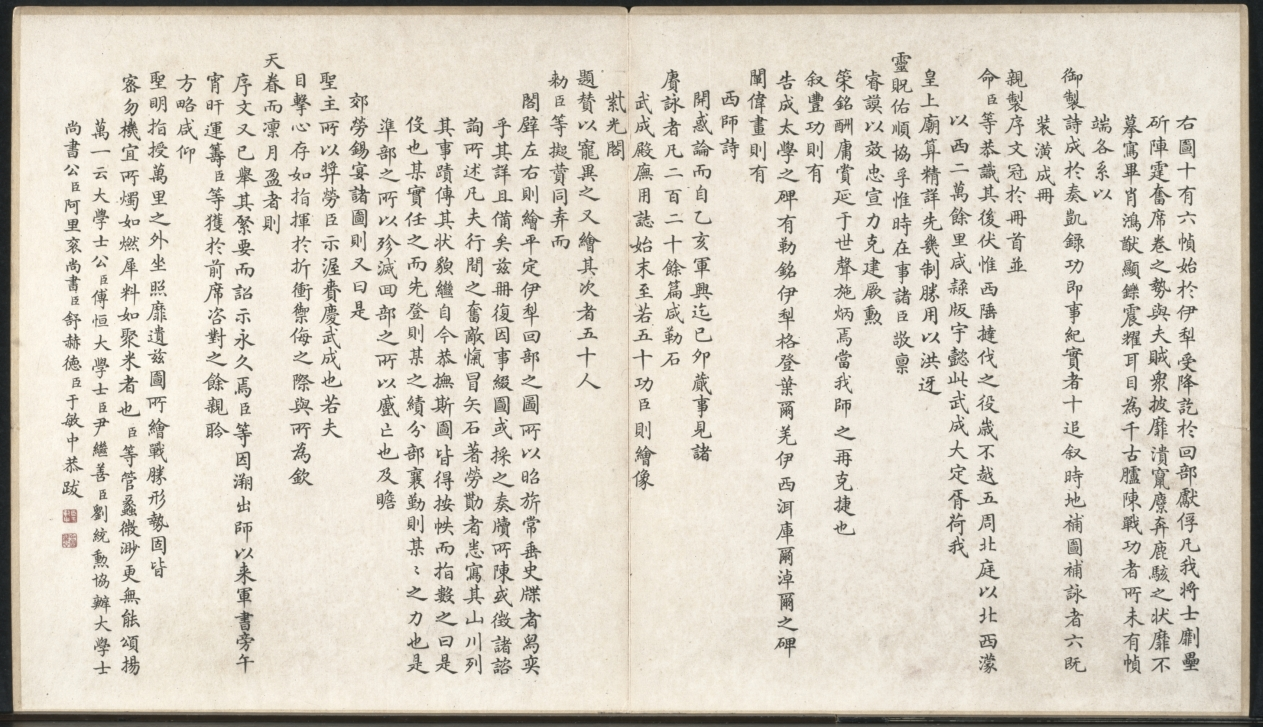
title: Battle Scenes of the Quelling of Rebellions in the Western Regions, with Imperial Poems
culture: China, Qing dynasty (1644–1911), Qianlong reign (1736–95)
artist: Giuseppe Castiglione (Italian, 1688–1766)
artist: Jean Damascene Sallusti (Italian, d. 1781)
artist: Jean Denis Attiret (French, 1702–1768)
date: c. 1765–74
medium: Etchings, mounted in album form, 16 leaves plus two additional leaves of inscriptions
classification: Print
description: This set of etchings was commissioned by Emperor Qianlong to record in pictorial terms the courage of his generals and soldiers in quelling the rebellions in the Western Regions. Qianlong added his own poem to each of the etchings, indicating his appreciation and pride in this demonstration of military might. "Western Regions" refers to the present-day Xingjiang province, often described in Western writing as "Central Asia."